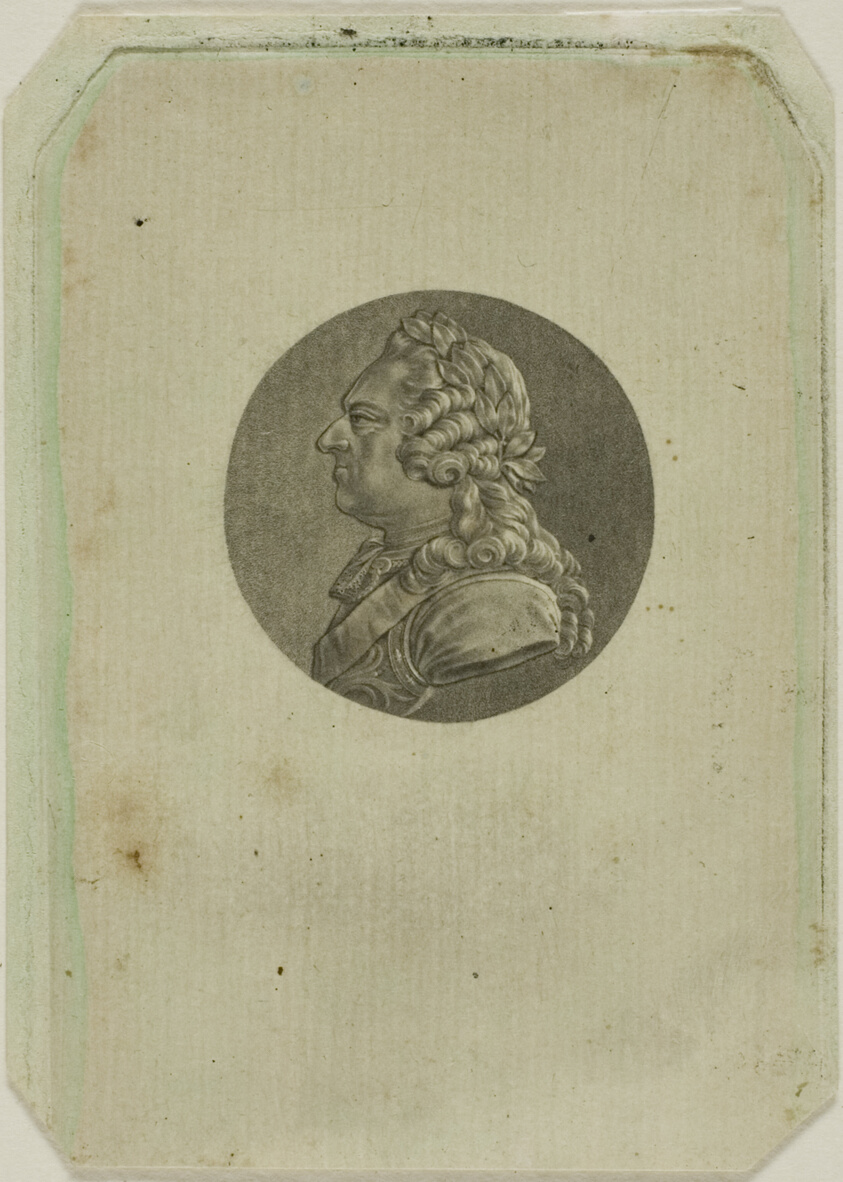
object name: Print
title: Louis XV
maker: Jean-Baptiste de Grateloup (French, 1735-1817); Jean Pierre Sylvestre (French)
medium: Engraving on paper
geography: France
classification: aquatint; print; prints and drawing